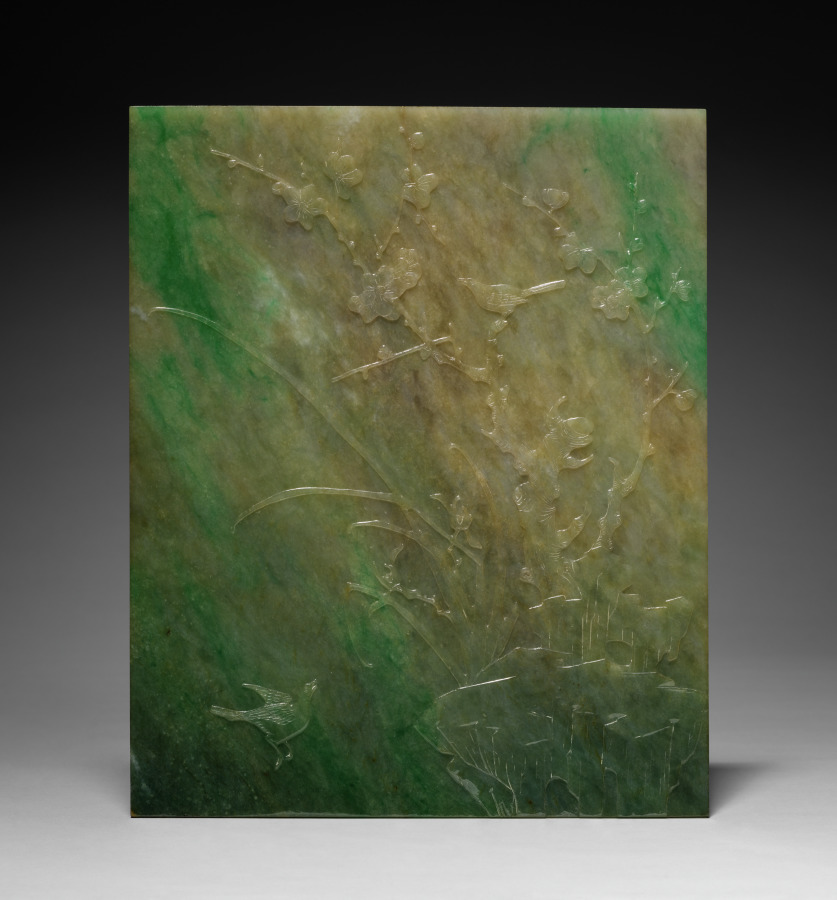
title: Table Screen with Stand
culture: China, Qing dynasty (1644-1911)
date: 1644–1911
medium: jade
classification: Jade